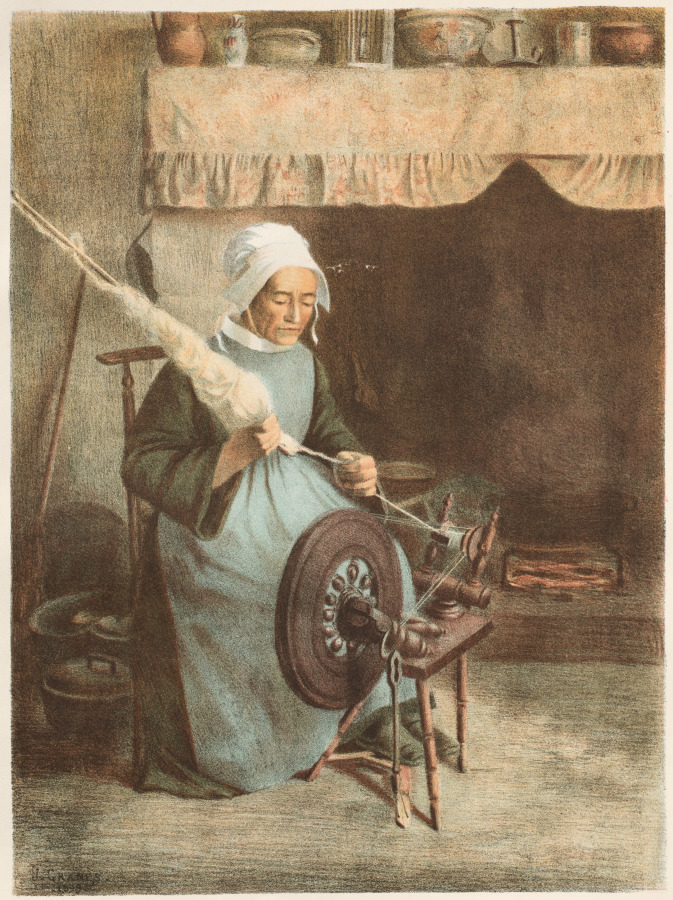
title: L'Aïeule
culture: France, 19th century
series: L'Estampe Moderne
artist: Jeanne Granès (French, 1887–1917)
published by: Imprimerie Champenois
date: 1899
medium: Color lithograph from bound volume containing 50 lithographs, each with a tissue paper guard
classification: Bound Volume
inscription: In plate, lower left corner of image: J.Granès / 1899; lower right corner of sheet: blindstamp of l'Estampe Moderne (Lugt 2790)